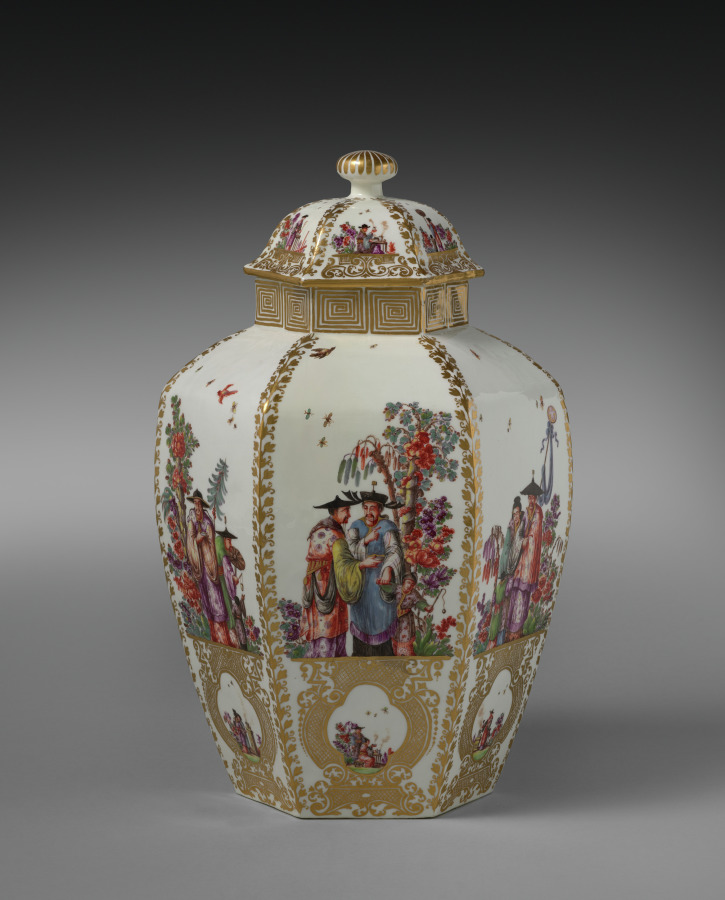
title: Covered Vase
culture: Germany, Meissen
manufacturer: Meissen Porcelain Factory (German, est. c. 1710)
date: c. 1728–30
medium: porcelain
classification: Ceramic